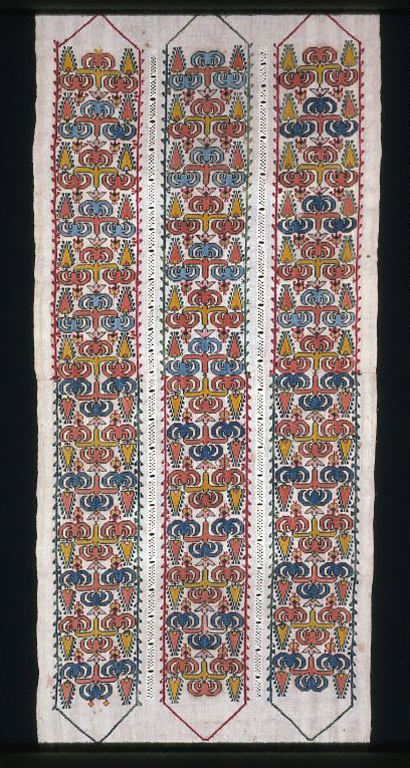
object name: Textile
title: Cover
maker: Greece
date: 19th century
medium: Cotton, plain weave; pulled thread work embroidered with silk in darning and hem stitches; embroidered in double running, four-sided, overcast and satin stitches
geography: Greece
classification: textile; needlework (visual works)